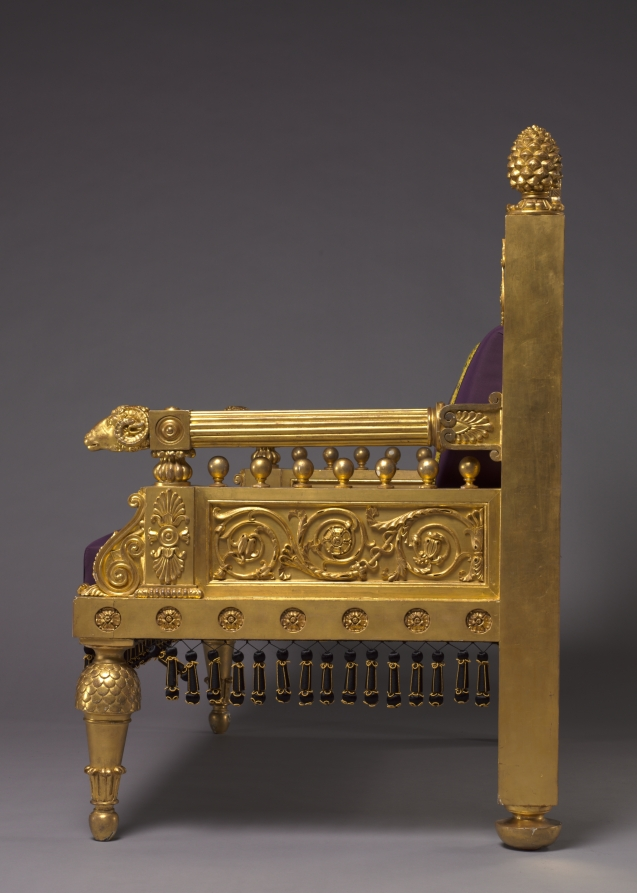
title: Settee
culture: England, 19th century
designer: Thomas Hope (British, 1769–1831)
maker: Unknown Maker (British)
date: c. 1802–07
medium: gilt-wood, reproduction wool upholstery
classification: Wood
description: An art collector, designer, and champion of neoclassicism, Thomas Hope designed this settee for display in his London house. Hope’s design exemplifies the continued interest in neoclassical ornament around 1800 through the use of elaborately carved friezes, a central pediment, and a lavishly gilded surface. In 1807 Hope published Household Furniture and Interior Decoration, featuring descriptions of his renowned collection of antiquities and the interior furnishings from his London house, including this settee. Many architects and cabinetmaking firms took inspiration from Hope’s designs, adapting Greek and Roman forms to create bold expressions of neoclassicism in their architecture and decoration.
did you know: The acorn finials, ram’s heads, and clusters of stylized honeysuckle flowers along the settee’s frame are typical of Thomas Hope’s neoclassical designs.